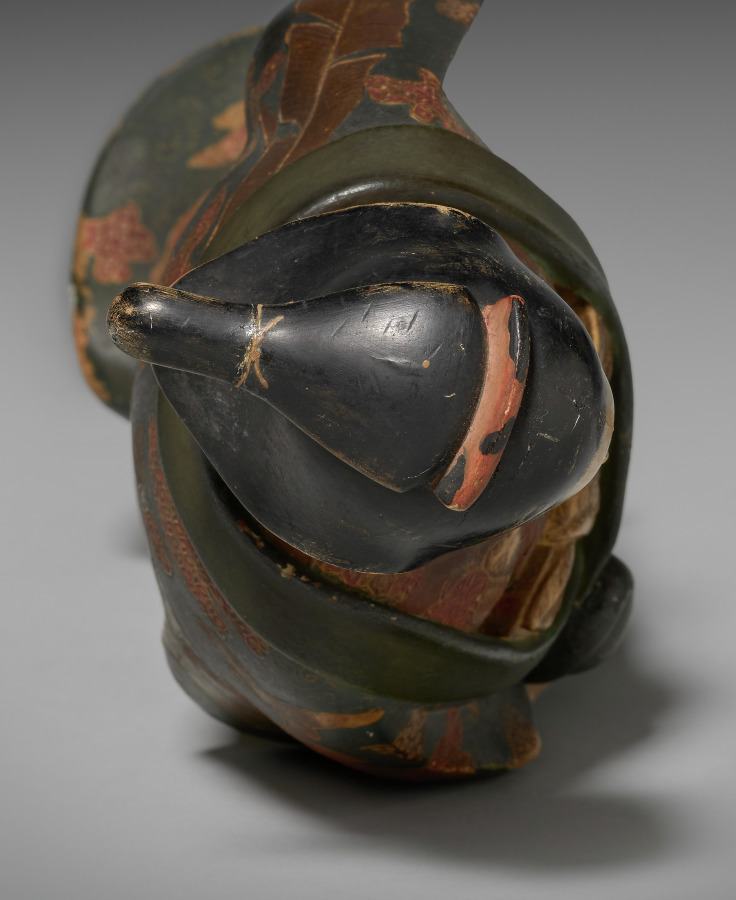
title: Saga Doll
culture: Japan, Edo period (1615–1868)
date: 1688–1703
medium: lacquered wood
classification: Sculpture